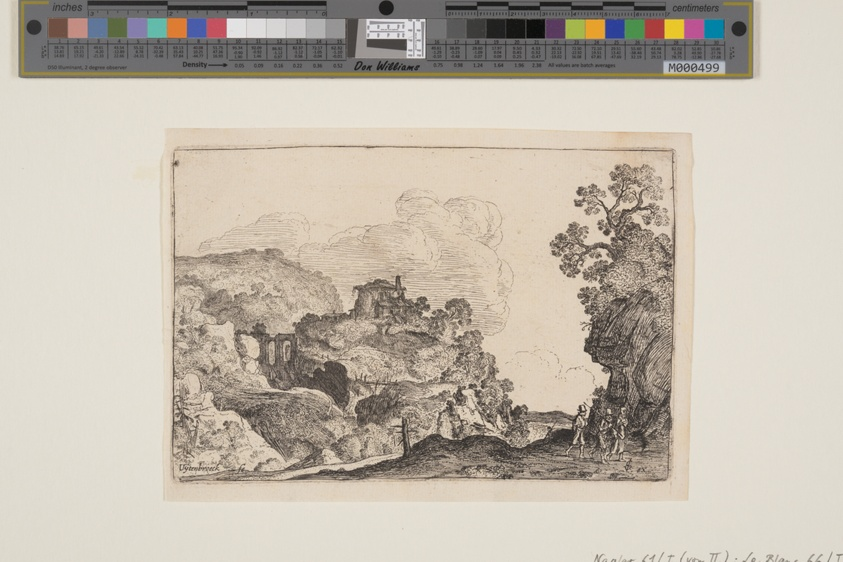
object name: Print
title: Rocky Landscape with Three Travelers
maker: Moses van Uyttenbroeck (Dutch, c. 1595–before 1647)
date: c. 1620-1640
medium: Etching on ivory laid paper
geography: Netherlands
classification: etching; paper; print; prints and drawing